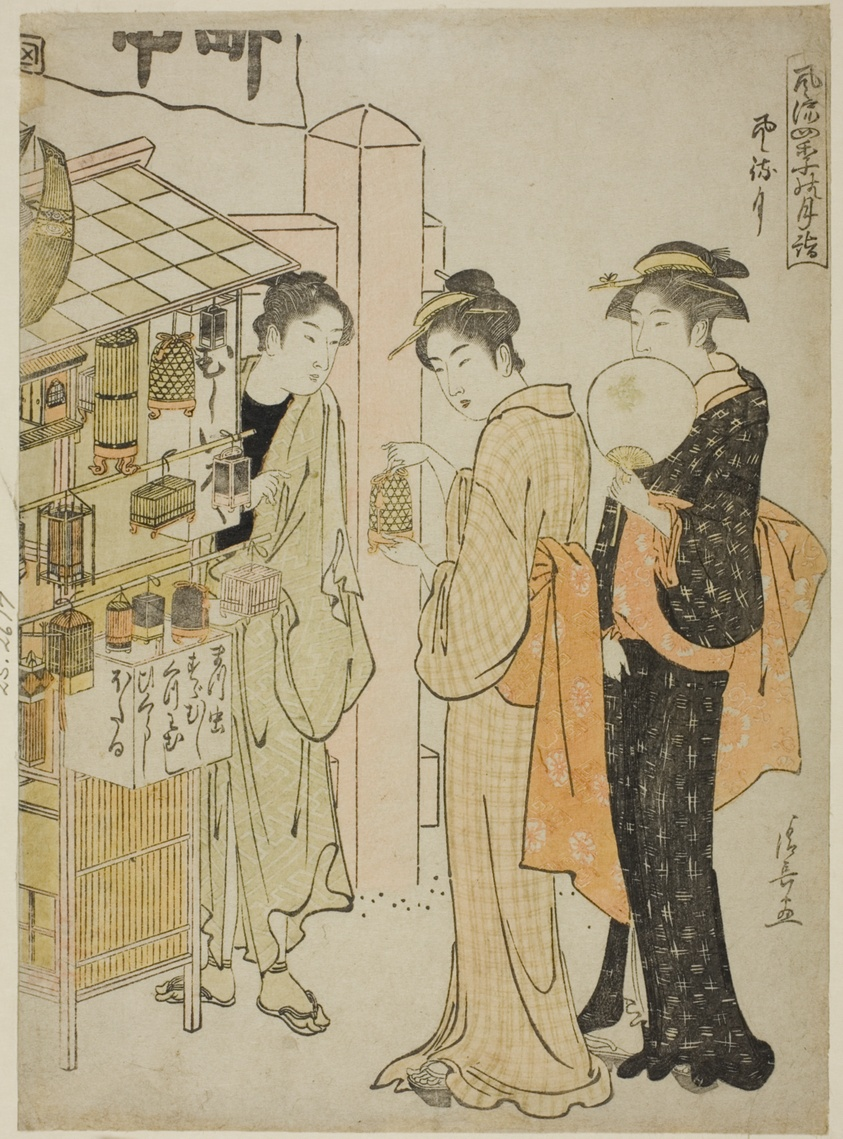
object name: Print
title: The Sixth Month (Kazemachizuki), from the series "Fashionable Monthly Visits to Sacred Places in the Four Seasons (Furyu shiki no tsuki mode)"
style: Japanese (culture or style)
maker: Torii Kiyonaga (Japanese, 1752-1815)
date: c. 1784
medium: Color woodblock print; chuban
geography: Japan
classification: woodblock print; print; asian art